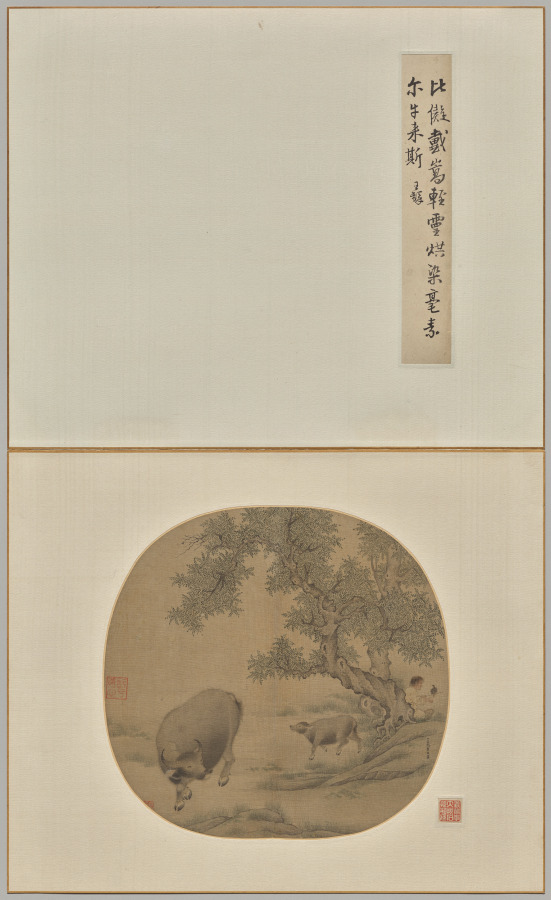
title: Man, Buffalo, and Calf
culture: China, Southern Song dynasty (1127-1279)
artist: Li You (Chinese, active c. 1145)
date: 1145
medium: album leaf; ink and color on silk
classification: Painting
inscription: Artist's inscription: 乙丑歲李祐/椿畫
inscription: 3 seals: 1 of Wu T'ing (c. 1600); 1 of An Kuo (1481–1534); 1 of Li Pao-hsün (1858–1915)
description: Here, a herdboy tending a cow with a calf is sitting beneath a tree with his pet myna bird. The painting can be read as a pastoral scene. As the water buffalo helped plow the fields, it was perceived as an animal that endures hard work without gain for itself, often interpreted as a metaphor for the official. Ox-herding pictures, presented as gifts in court circles, were used for their moral and political rhetoric. The Yijing (Book of Changes) states, The Receptive is the earth, the mother . . . it is a cow with a calf . . . the multitude [in relation to the ruler].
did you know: Li You included such tiny details as circular patterns of hair on the buffalo’s hindquarters.